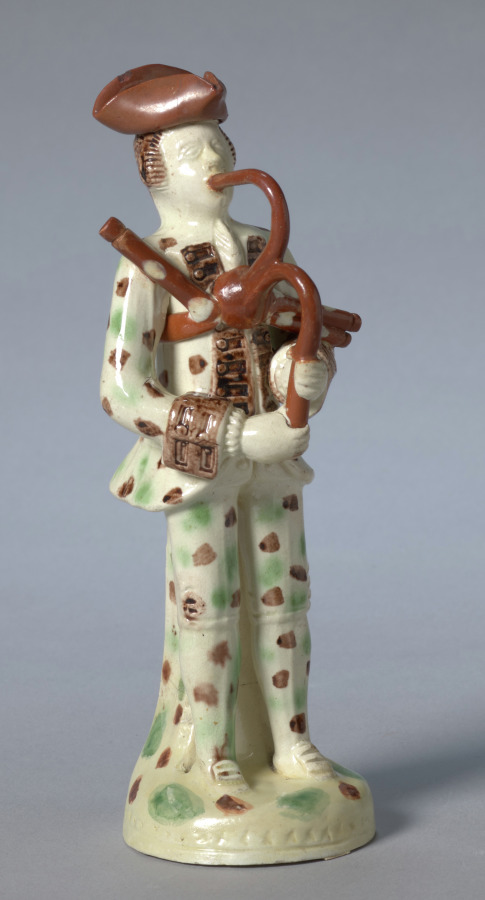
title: Bagpiper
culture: England, Staffordshire, 18th century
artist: Staffordshire Factory (British)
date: c. 1740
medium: earthenware (Astbury-Whieldon type)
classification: Ceramic